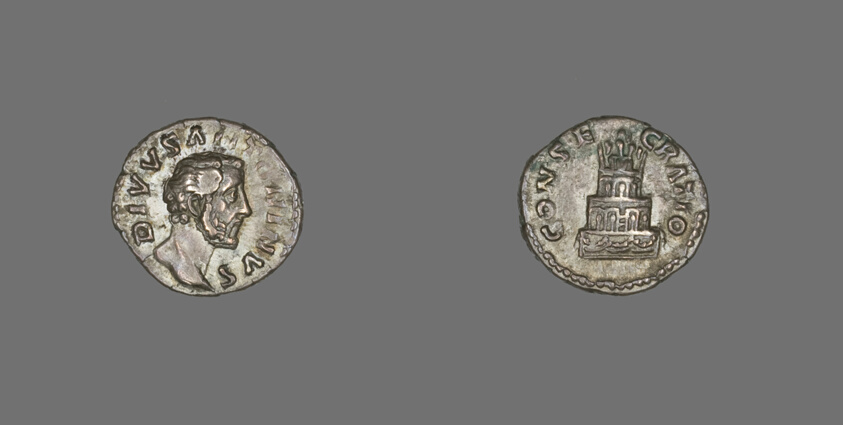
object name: Coin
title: Denarius (Coin) Portraying Emperor Antoninus Pius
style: roman (ancient, style or period), ancient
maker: Roman, minted in Rome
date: 176-180, struck by Marcus Aurelius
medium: Silver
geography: Italy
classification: coin; ancient art; struck